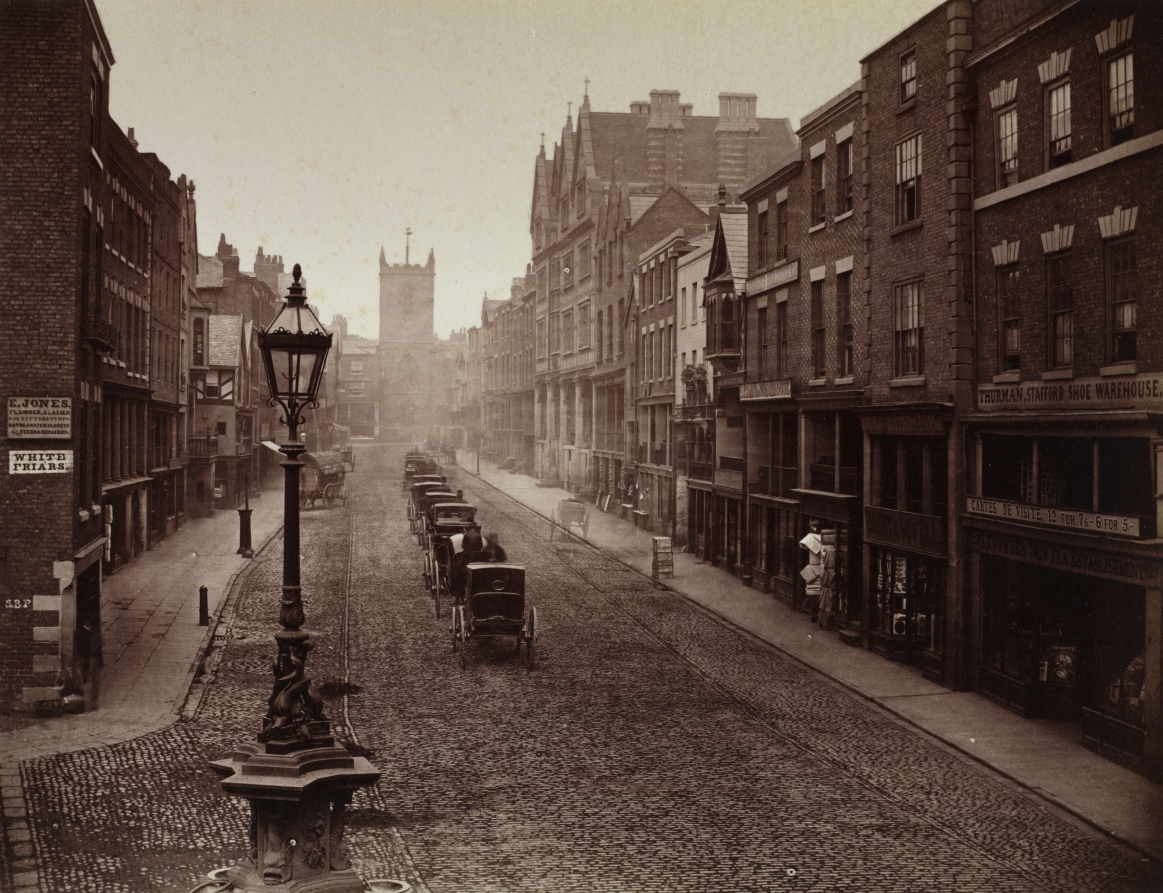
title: Bridge Street, Chester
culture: England, 19th century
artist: Augustus Kelham (British, 1819–1897)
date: 1865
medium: albumen print from wet collodion negative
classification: Photograph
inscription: Written in pencil on recto: "Bridge Street / Chester"; "16"